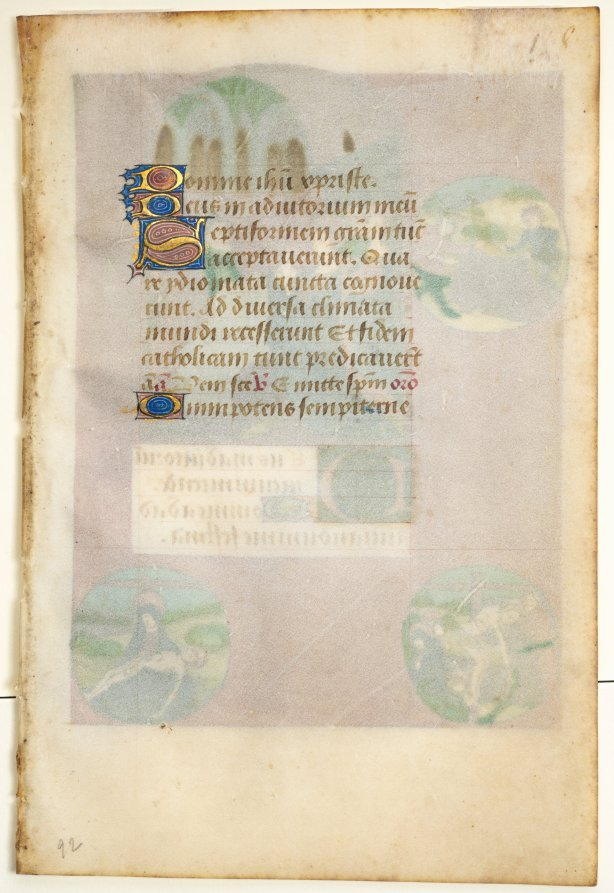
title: Leaf from a Book of Hours: Presentation in the Temple with Roundels of the Casting of Lots, the Deposition, and Pietà (None, Office of the Virgin)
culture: France, probably Poitiers, 15th century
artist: follower of Master of Adélaïde de Savoie (French, active c. 1450–70)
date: c. 1460–70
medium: ink, tempera and gold on vellum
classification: Manuscript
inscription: Deus in adiutorium meum intende. Domine, ad adiuvandum me festina.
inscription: Oratio: Omnipotens sempiterne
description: The style of this miniature, with its oval faces, abundant draperies, and use of border roundels, follows very closely the characteristics of the Master of Adélaïde de Savoie, who takes his name from a book in Chantilly (Musée Condé, MS. 1362). His activity points to Poitiers in western France as a possible place of production for this piece. The miniature features the unusual placement of roundels showing scenes taken from Christ's Passion against an episode from the life of the Virgin. The main miniature, the Presentation in the Temple, depicts the bringing of the infant Jesus to the Temple forty days after his birth to be consecrated according to Jewish law. During the ceremony, the temple's priest, Simeon, foretold that "Mary's heart would be pierced through her child." The roundels visually dovetail the central miniature.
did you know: The images and decorated initials in the book helped users navigate to sections they needed while also offering details to provoke meditation and prayer, leading to books of hours sometimes being referred to as “painted prayers.”